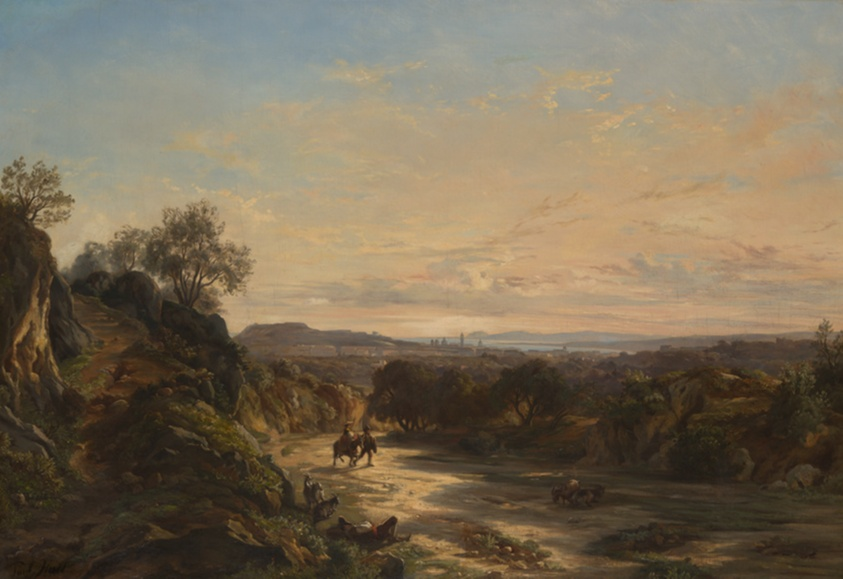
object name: Painting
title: Sur la route de Nice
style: nineteenth century, 19th century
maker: Paul Huet (French, 1803-1869)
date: c. 1844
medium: Oil on canvas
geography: France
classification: oil on canvas; french; oil paintings (visual works); paint; painting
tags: travel, women, men, goats, rocks, France, water, clouds, sky, bushes, mountains, trees, animals, paths, road, landscape, route, countryside, donkeys, people